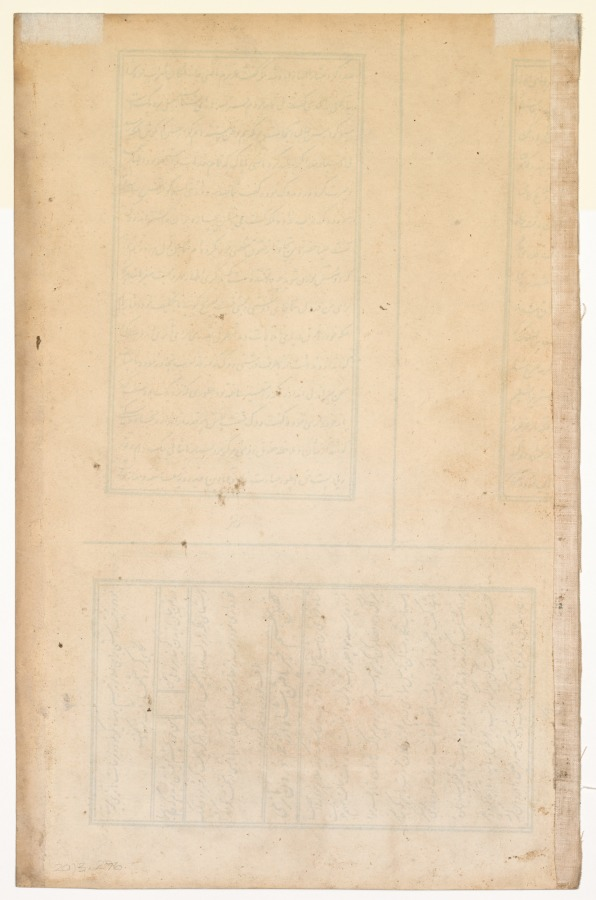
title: A mendicant bowing before a holy man, from the Prince Salim Album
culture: Mughal India, court of Akbar (reigned 1556–1605)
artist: Basavana (Indian, active c. 1560–1600)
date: c. 1585; inner border added in Allahabad c. 1602; outer border added probably 1900s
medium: Gum tempera, ink, and gold on paper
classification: Painting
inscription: Persian inscription on mendicant’s bowl, in nasta‘liq script: the work of Basavana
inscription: Persian verse at top from a ghazal (lyrical poem) of Hafiz (Persian, 1325–1389), in nasta‘liq script: I have fallen at his feet, grieving and wailing./ Could it be that I might receive a helping hand?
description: As the Mughal atelier grew into the 1580s, Indian artists become increasingly adept at incorporating Persian styles with a new dimensionality and naturalism that Akbar promoted, possibly based on his appreciation of European prints and paintings. Here, a sincere holy man wears robes tinged lightly with blue. He stands beneath a tree in the wilderness with a loyal jackal by his side. A devotee touches his head to his feet. The artist’s tiny signature is written on the alms bowl. Connoisseurs of Persian art in the Islamic world praised an artist’s virtuoso ability to work on a microscopic scale.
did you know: The dog stares hungrily at the mendicant’s alms bowl, with the artist’s signature.